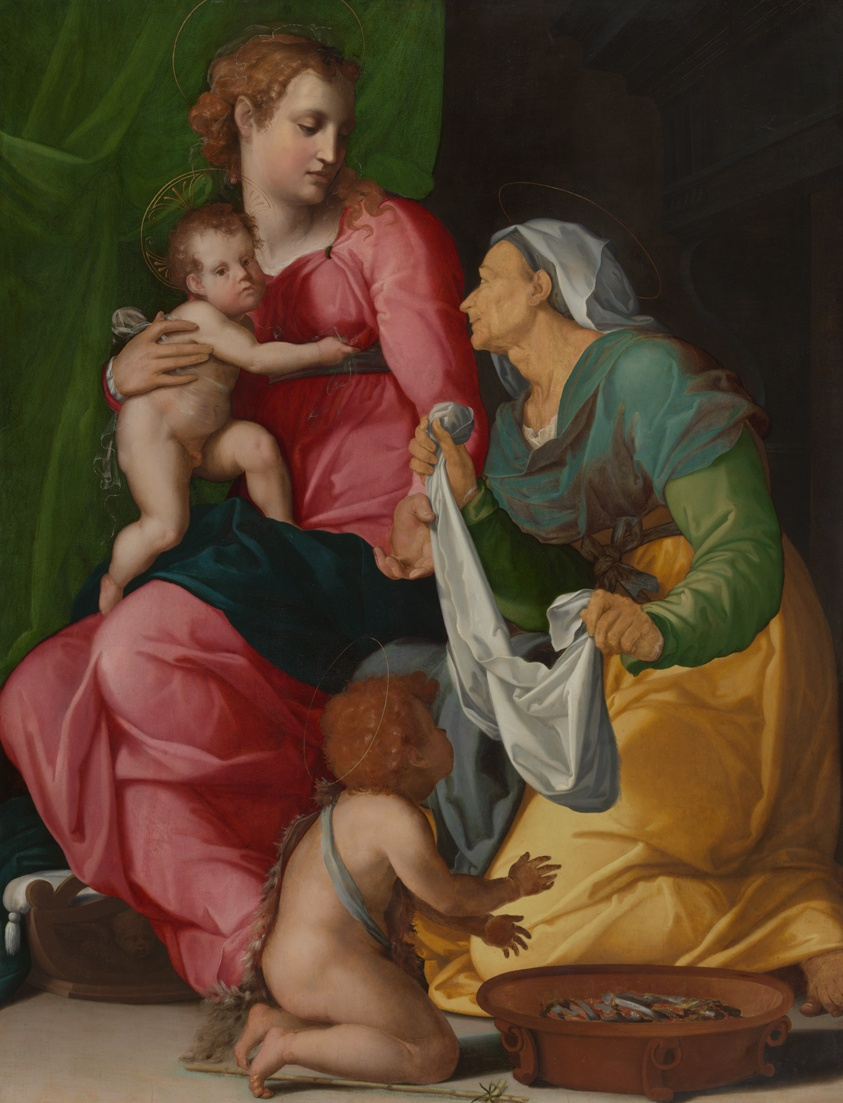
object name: Painting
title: Madonna and Child with Saints Elizabeth and John the Baptist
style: Mannerism, 16th Century, Renaissance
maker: Jacopino del Conte (Italian, 1510–1598)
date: 1535–40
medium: Oil on panel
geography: Italy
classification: painting; european painting; oil; oil on panel; paint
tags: Madonna and Child, Virgin Mary, Virgin and child/Madonna and child, saints, religion, religious scenes, religious figures, religious, biblical, Christianity, Christian subjects, Jesus, Madonna, Saint Elizabeth, Saint John the Baptist